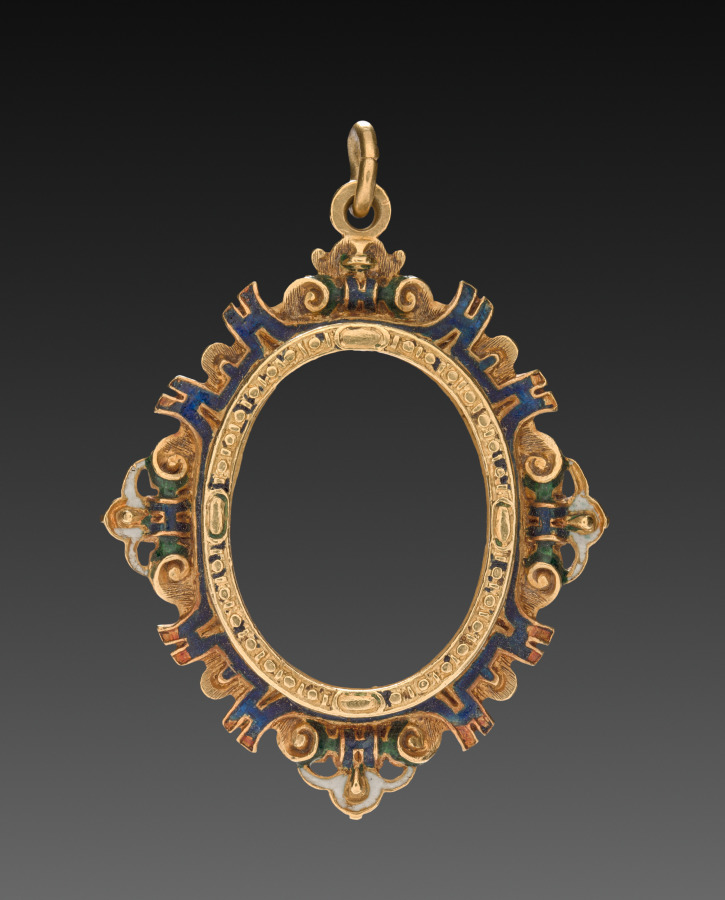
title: Pendant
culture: Germany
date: 1500s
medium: gold and enamel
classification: Jewelry